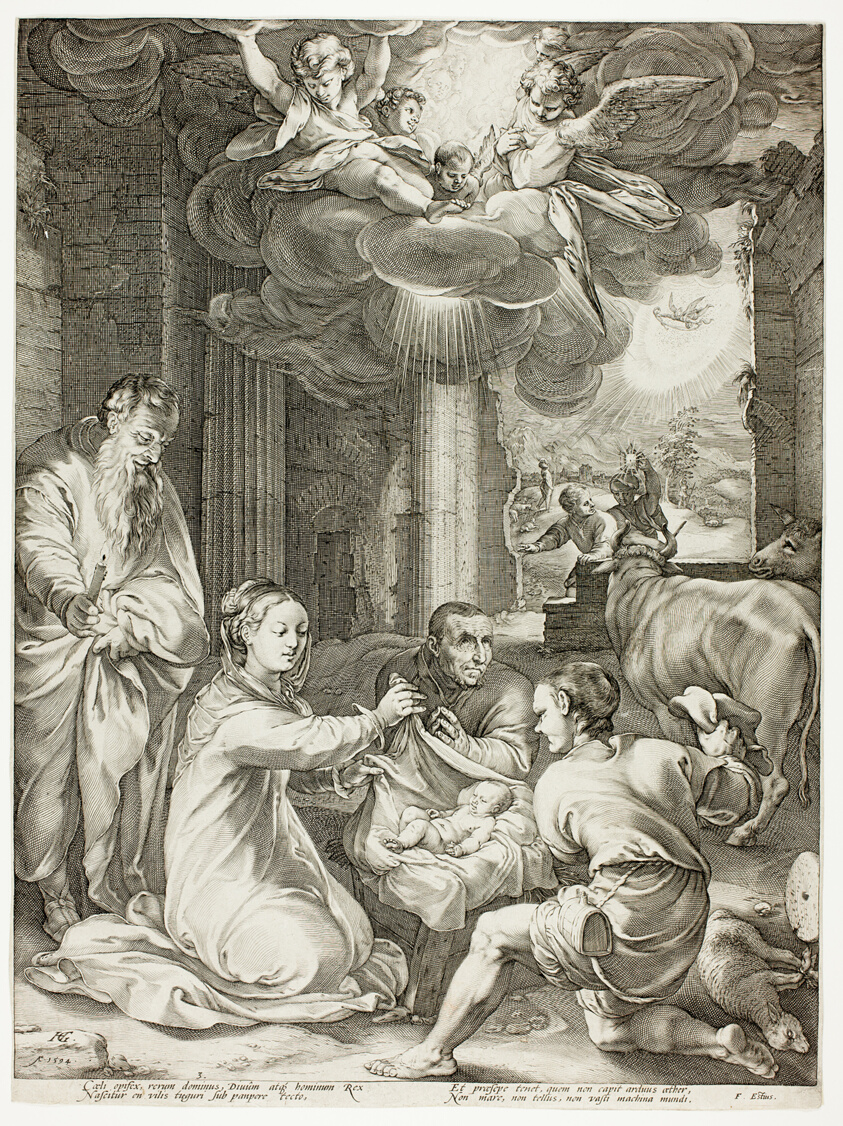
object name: Print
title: The Adoration of the Shepherds, plate three from The Birth and Early Life of Christ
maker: Hendrick Goltzius (Dutch, 1558-1617); text written by Franco Estius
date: 1594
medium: Engraving on paper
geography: Netherlands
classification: engraving; print; prints and drawing